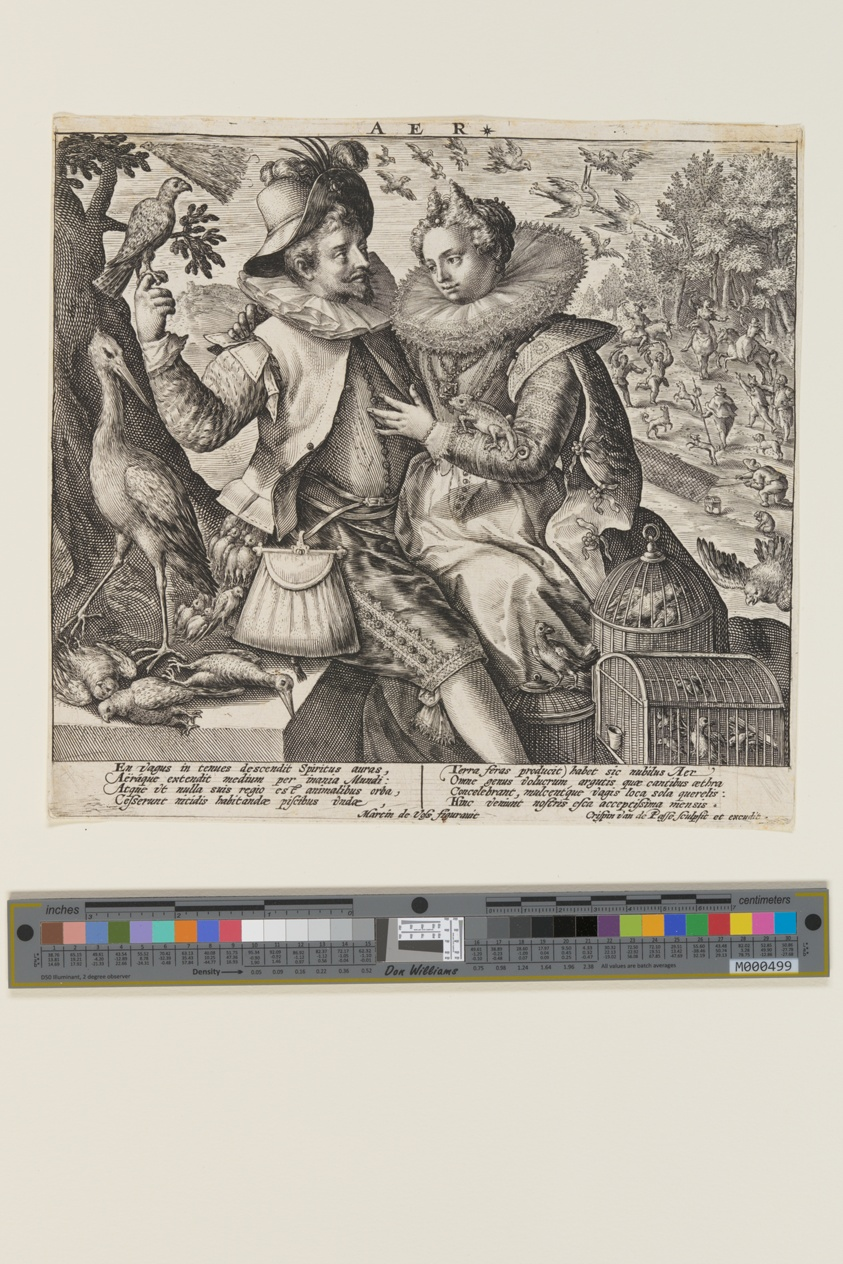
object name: Print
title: Aer (Air), from The Elements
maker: Crispijn van de Passe I (Dutch, c. 1565–1637); after Maerten de Vos Maarten de Vos (Flemish, 1532–1603)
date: c. 1600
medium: Engraving on ivory laid paper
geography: Netherlands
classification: engraving; paper; print; prints and drawing